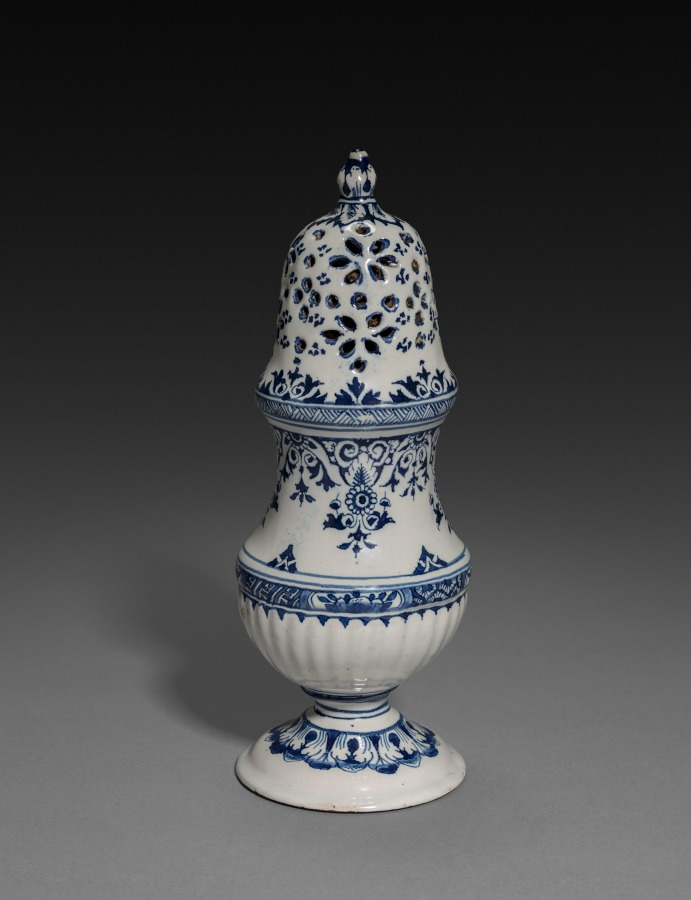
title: Sugar Caster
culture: France, Moustiers(?), early 18th century(?)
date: early 1700s ?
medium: faience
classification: Ceramic